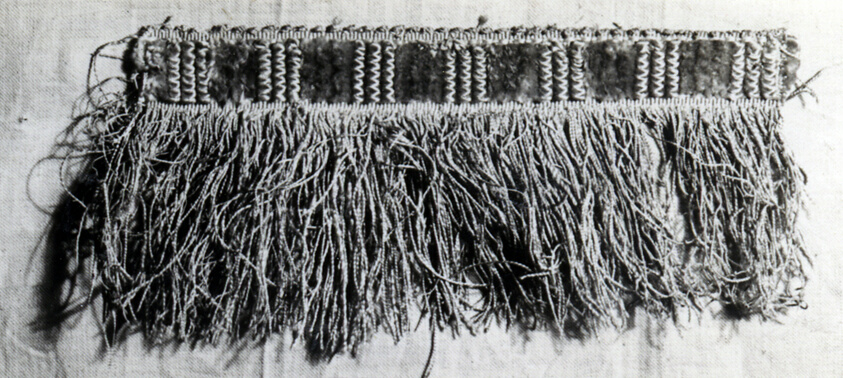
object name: Textile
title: Fringe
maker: Italy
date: 17th/18th century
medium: silk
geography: Italy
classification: textile; weaving